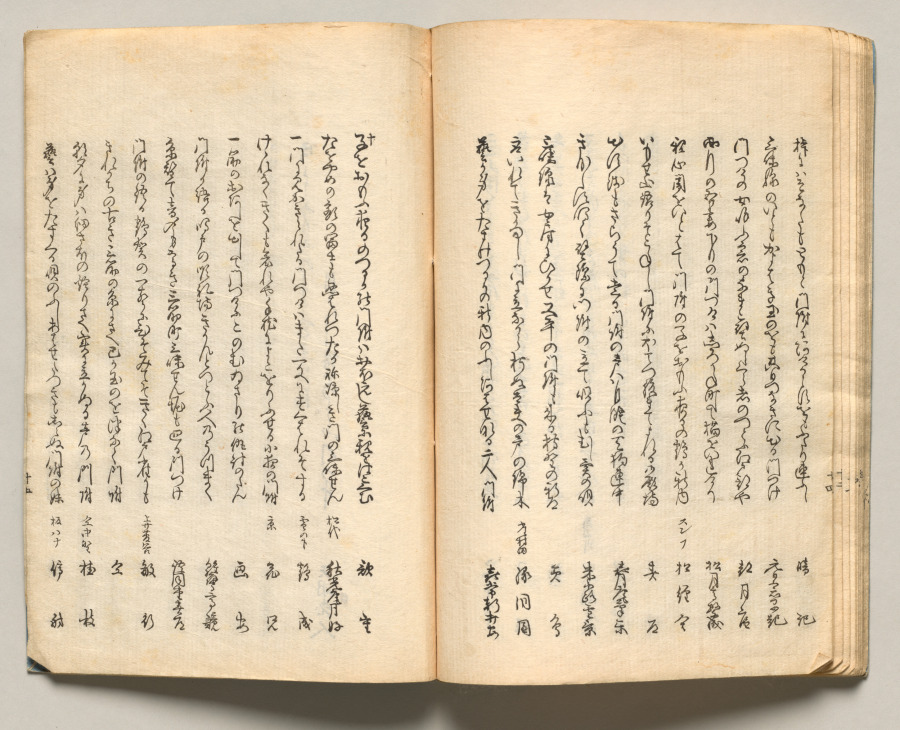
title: Spread Twenty-Two from Volume Three of People of Japan in Light Verse (Kyōka)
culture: Japan, Edo period (1615–1868)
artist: Utagawa Hiroshige (Japanese, 1797–1858)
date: 1857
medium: Woodblock-printed book; ink and color on paper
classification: Bound Volume